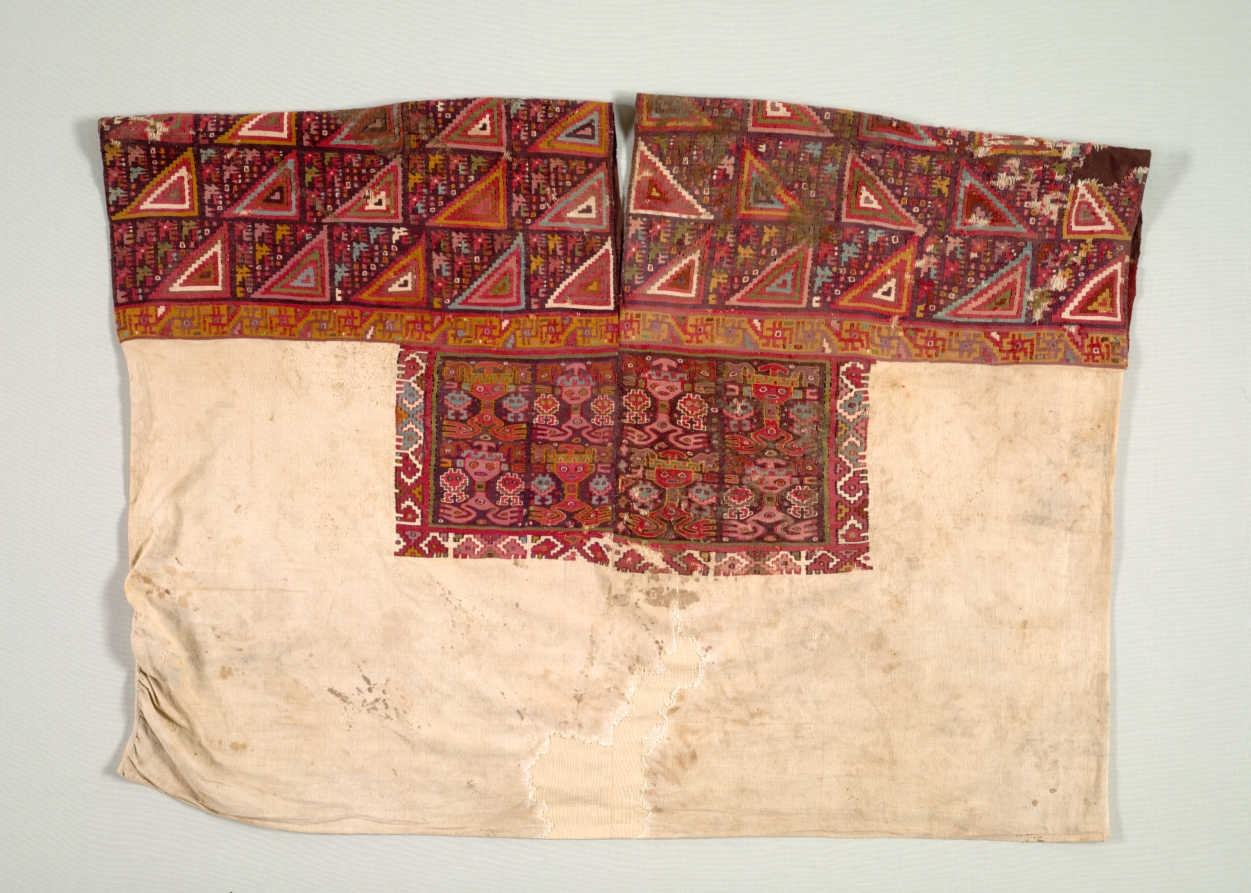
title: Tunic (Shirt) with Tapestry-woven Yoke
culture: Central Andes, Northern Central Coast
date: 650–850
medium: camelid fiber and cotton; tapestry-weave yoke and chest plaque, plain-weave body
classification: Textile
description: Likely an item of men’s wear, this tunic exhibits a variety of motifs. The upper panels feature an especially pronounced triangular pattern. The rectangle at the center of the chest displays a repeated frontal figure that stands out for its relatively large size and more rounded style. The surrounding elements are more right-angled, including the small figures in flanking positions and the birds in the borders.